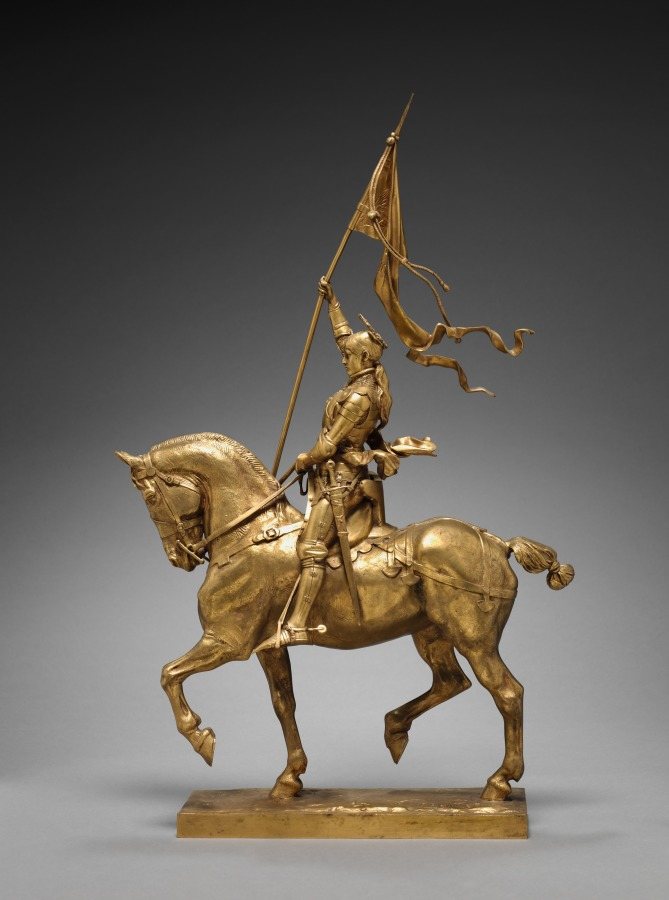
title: St. Joan of Arc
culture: France, 19th century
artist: Emmanuel Fremiet (French, 1824–1910)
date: 1874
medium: gilt bronze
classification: Sculpture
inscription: signed: "FREMIET"; inscription on flag: "IHS, MARIA."